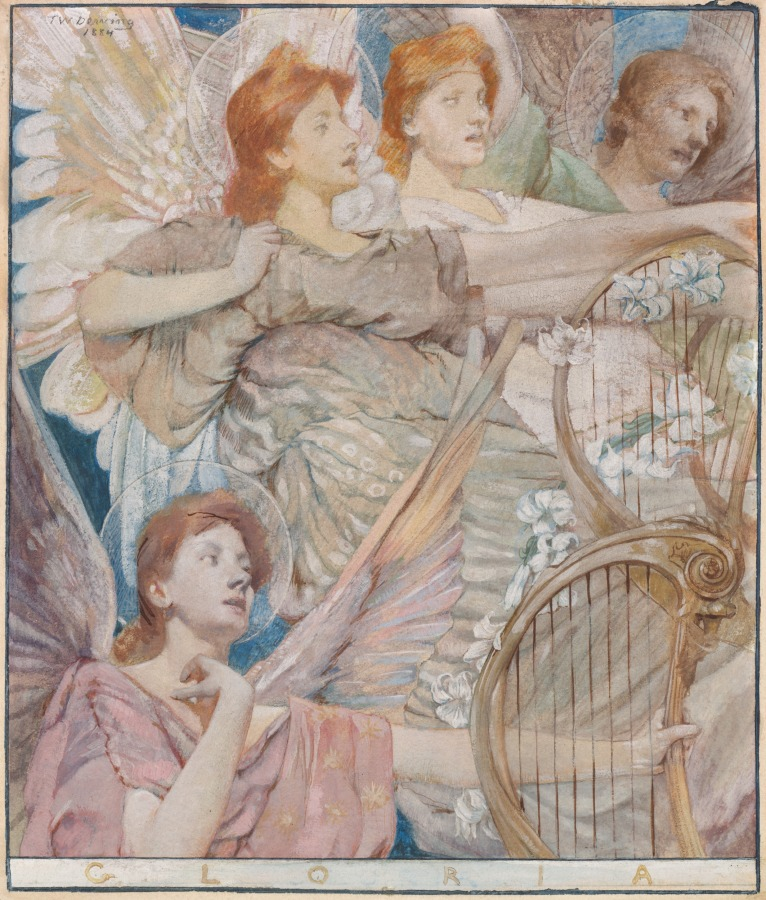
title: Gloria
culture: America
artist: Thomas Wilmer Dewing (American, 1851–1938)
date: 1884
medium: gouache over graphite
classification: Drawing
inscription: signed, upper left, in graphite: T W Dewing / 1884; by artist, across bottom, in watercolor: gloria; verso, center, in graphite: [sTC?] [underlined]; 15 x 162 [underlined] / 165; center left, in graphite: 125 [underlined]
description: Dewing’s small, densely packed composition of four singing angels alludes to depictions of angels playing musical instruments found in 14th-century medieval manuscripts. Angels were traditionally shown playing stringed instruments, whose delicate tones were thought to lift the mind to spiritual matters. The harp, as depicted here, was the instrument most closely associated with heavenly music. With the continuous circling of halos and harps, Dewing suggested a hypnotic, celestial melody.